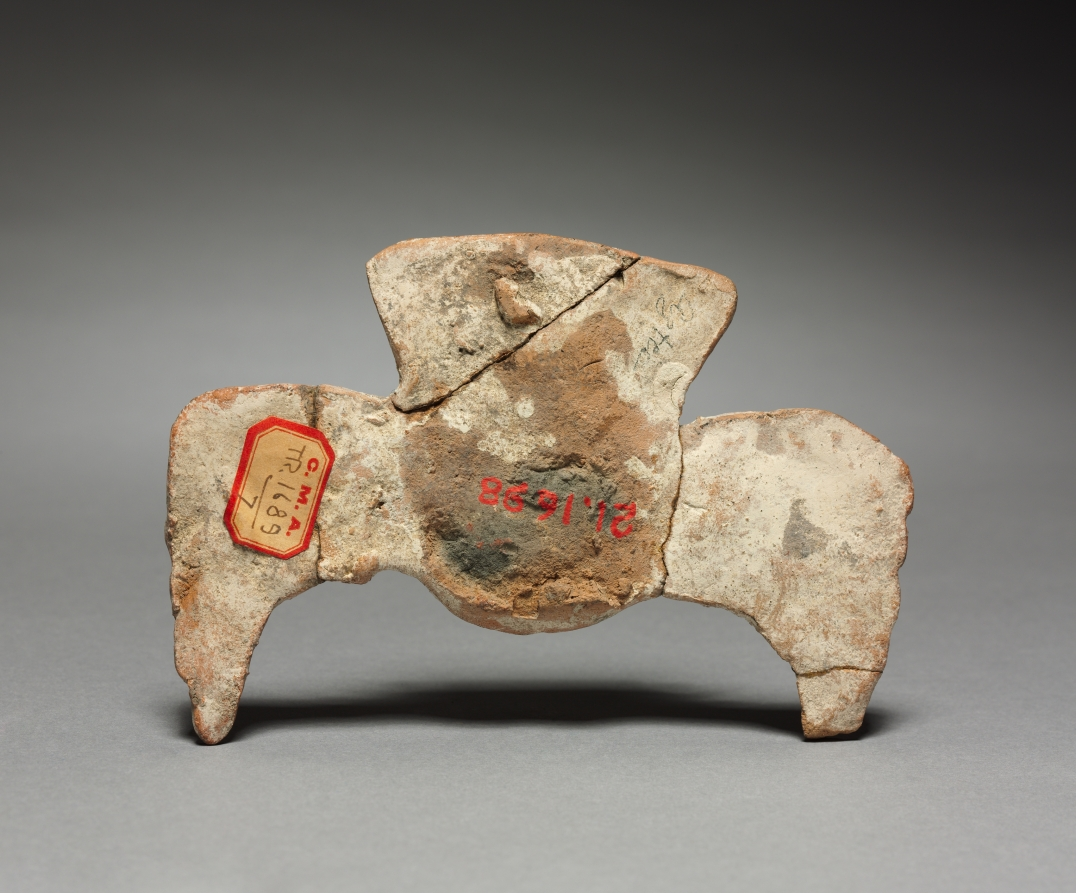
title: Headdress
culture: Mexico, Teotihuacan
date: 1–750 CE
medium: pottery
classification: Ceramic